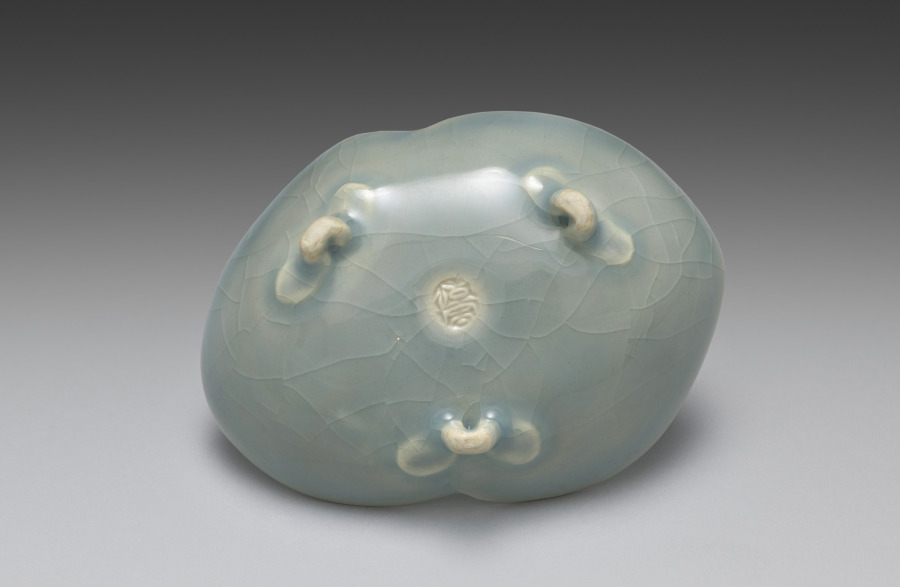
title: Dish from Saucers with Matching Shells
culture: Japan, Meiji period (1868–1912)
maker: Seifū Yohei III (Japanese, 1851–1914)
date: 1893–1914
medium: Porcelain with molded design and green crackled glaze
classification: Ceramic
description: Yohei III’s main output for his sophisticated clientele was in the form of tea sets and dining sets. He created a range of dishes in green glazes. He often produced in pairs, sets of five, or sets of ten. The set of five dishes with a more complex form is described as having a “water-colored glaze” (mizuiroyū). These are shaped like clam half shells, a reference to a game in which shell halves painted with narrative scenes or a variety of motifs must be matched back together by the players. The dishes have molded details to articulate the shell forms, and the crackling across each shell adds another dimension to the surface. Each dish is set on three small feet, formed by a pinched piece of clay and attached to an unglazed area on the underside of the dish. Curiously, while four of the dishes are stamped with the artist’s mark, one has instead a signature carved into the base.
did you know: Each of the paired-shell dishes has its own compartment in a long, flat box.